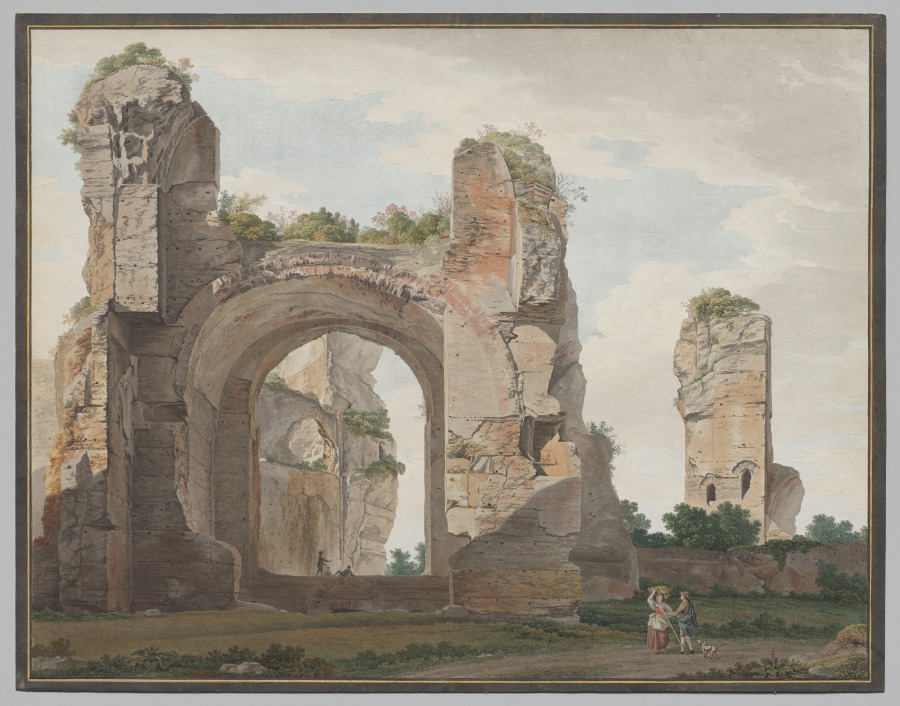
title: A View of the Ruins of the Baths of Caracalla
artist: Giovanni Battista Lusieri (Italian, 1750–1825)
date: 1779–81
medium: graphite, pen and black ink, watercolor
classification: Drawing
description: Lusieri was known among his Grand Tour patrons for his meticulous technique and his originality: for example, his choice of an unusual view of the Baths of Caracalla, as here, taken from within the ancient site. With an astonishing commitment to the truthful depiction of nature and ruins, and an extreme awareness of the nuances of light at different times of day, he depicted the ruins in the late afternoon. The presence of figures emphasizes the massive scale of the ruins in the warm Italian sun in this significantly large, impressive sheet, a welcome souvenir to his patron, an English Lord, when he returned to England.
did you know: The artist Lusieri accompanied the British Lord Elgin to Athens in the late 1790s and participated in the dismantling of the Parthenon’s metope sculptures there, now famously called the Elgin marbles.